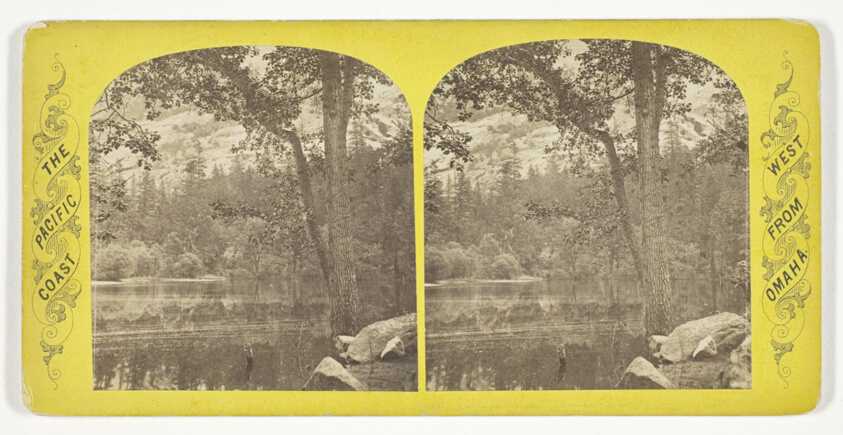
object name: Photograph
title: Mirror Lake A, No. 35 from the series "California and The Pacific Coast, West from Omaha"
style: 19th century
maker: Andrew J. Russell; American, 1830–1902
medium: Albumen print, stereo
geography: United States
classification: stereograph (albumen); albumen silver print; photographic process; photography; photograph